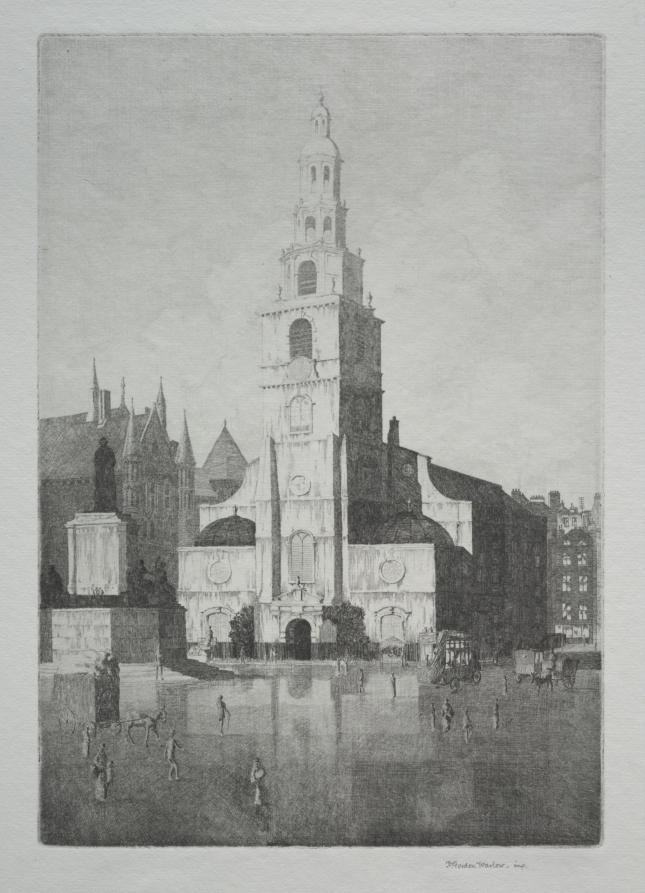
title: St. Clement's Dane, Strand, London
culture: England, 20th century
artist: Herbert Gordon Warlow (British, 1885–1942)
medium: drypoint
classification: Print